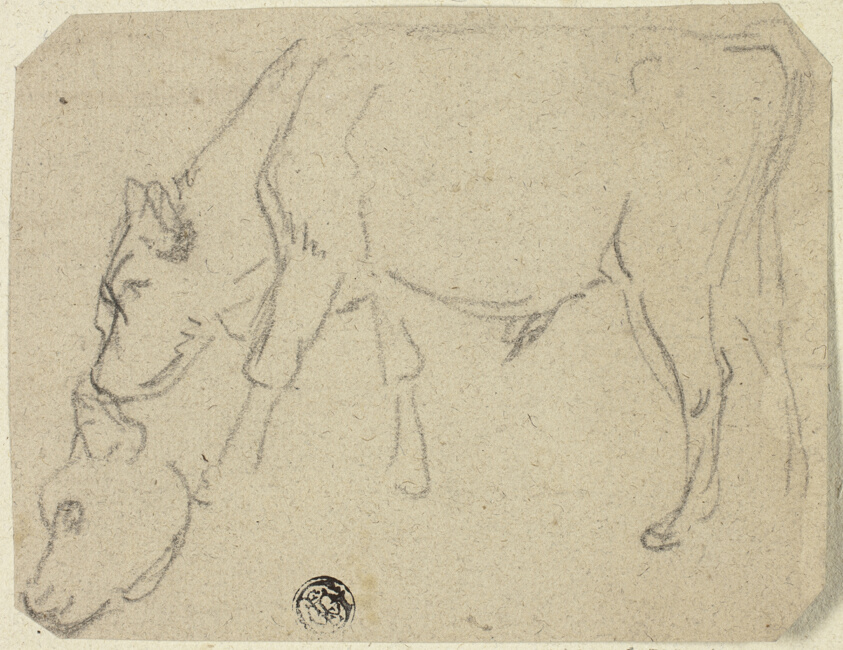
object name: Drawing and Watercolor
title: Sketches of Grazing Bull, Cow's Head (recto); Seated Cow in Profile (verso)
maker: Unknown Artist; English, 19th century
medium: Charcoal (recto and verso) on buff laid paper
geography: United Kingdom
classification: charcoal; drawings (visual works); prints and drawing; paper